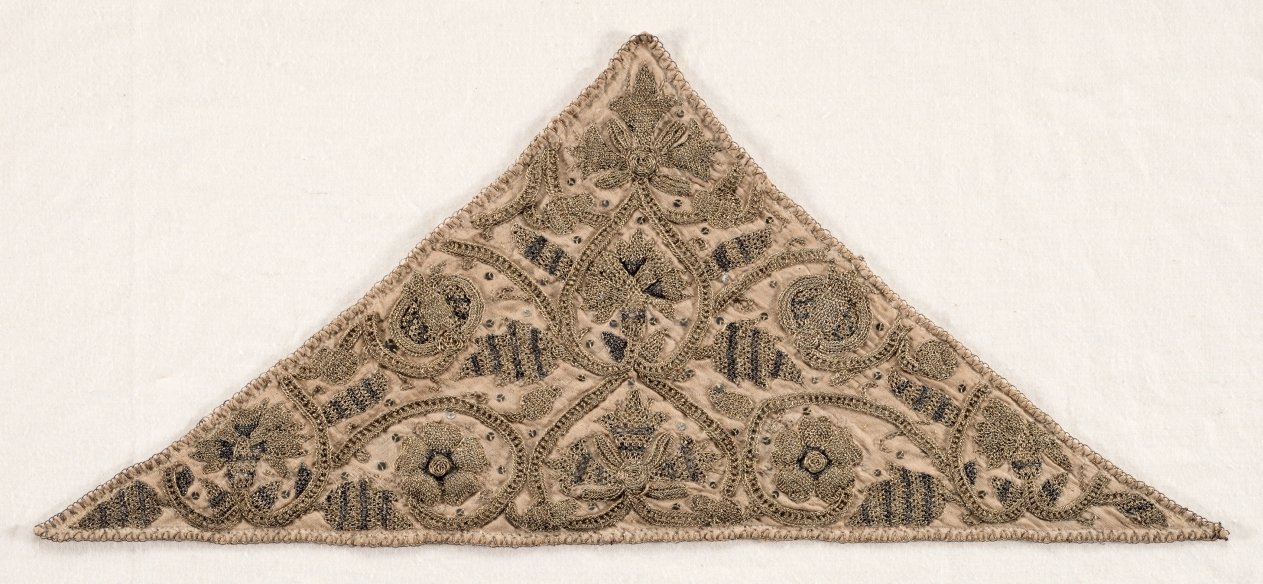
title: Forehead Cloth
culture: England, Elizabethan Period, late 16th century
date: late 1500s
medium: Silk, gold and silver thread, sequins, padding, linen; embroidery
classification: Embroidery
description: Sumptuous interlacing scrolls bearing flora and fruit embroidered with gold, silver, and silk thread decorate this set composed of a coif (cap see 1934.206) and forehead cloth (seen here). Individual motifs representing England appear within the scrolls, such as the Tudor rose, carnation, honeysuckle, and acorn. Fashionable ladies wore coifs in the house as semiformal dress and in bed for receiving guests. The large loops along its lower edge were drawn together to keep it in place. Worn pointing backward, the forehead cloth functioned like a visor, supposedly preventing wrinkles and keeping off the sun and cold air.